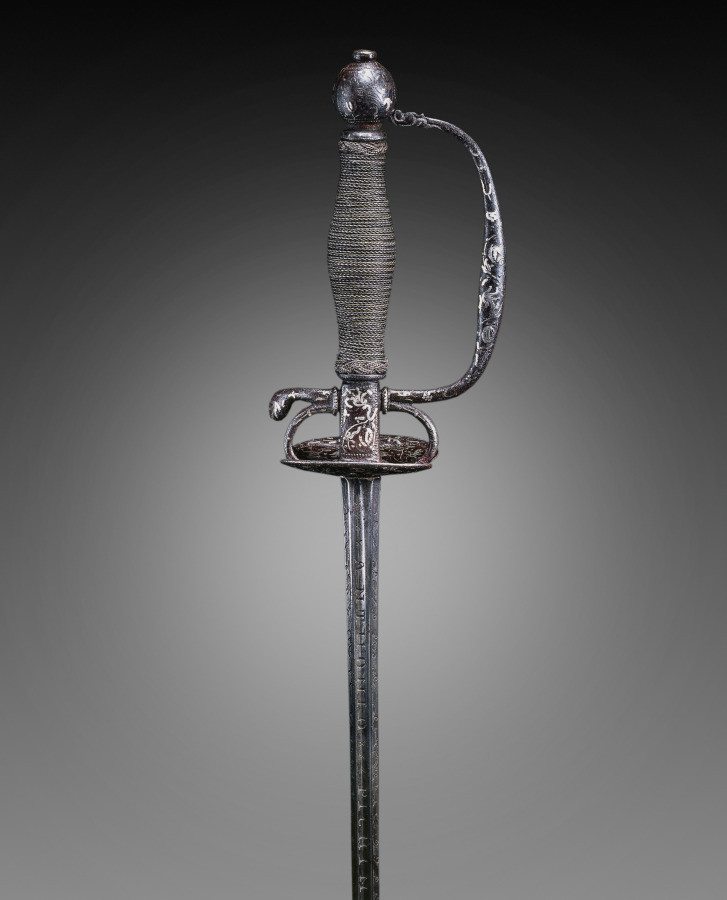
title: Small Sword for a Boy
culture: Italy, 17th century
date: c. 1650–1680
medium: steel, wood; hilt with inlaid floral designs in silver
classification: Arms and Armor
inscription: ANTHONIO PICHINIO